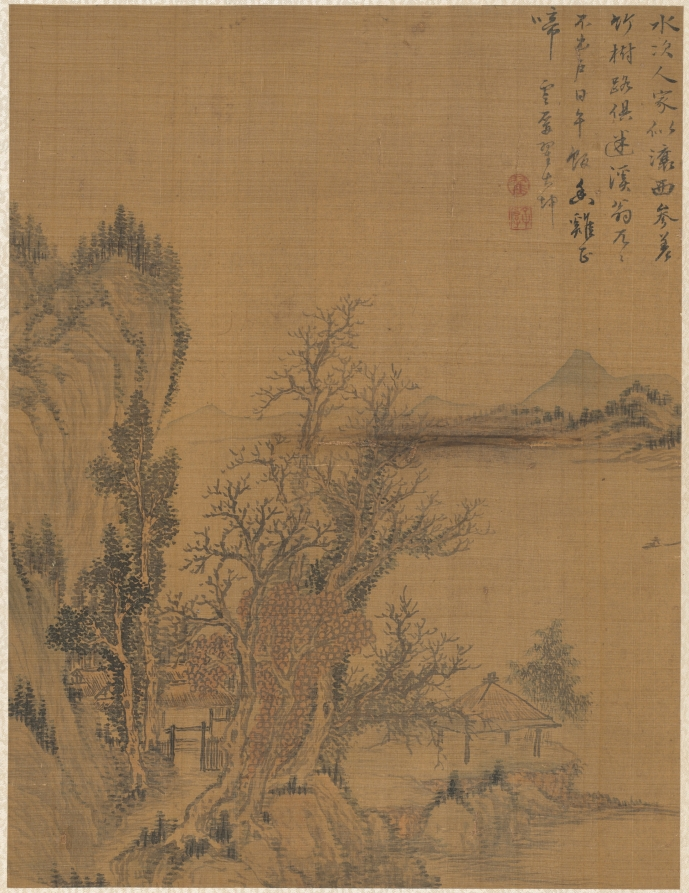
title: Landscape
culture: China, Qing dynasty (1644-1911)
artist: Zhai Dakun (Chinese, d. 1804)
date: 1775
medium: album leaf; ink and color on silk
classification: Painting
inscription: Dwelling by the Shore. By the water a human dwelling resembles Liaoxi, The scattered branches of bamboo and trees are all a jumbled mass. The old man of the stream resolutely refuses to come out of his gate, At noon he drinks in the fragrance, just as a cock crows. Yunping Zhai Dakun. Seals: 1) c/r "Zhai" 2) s/r "Zihou"